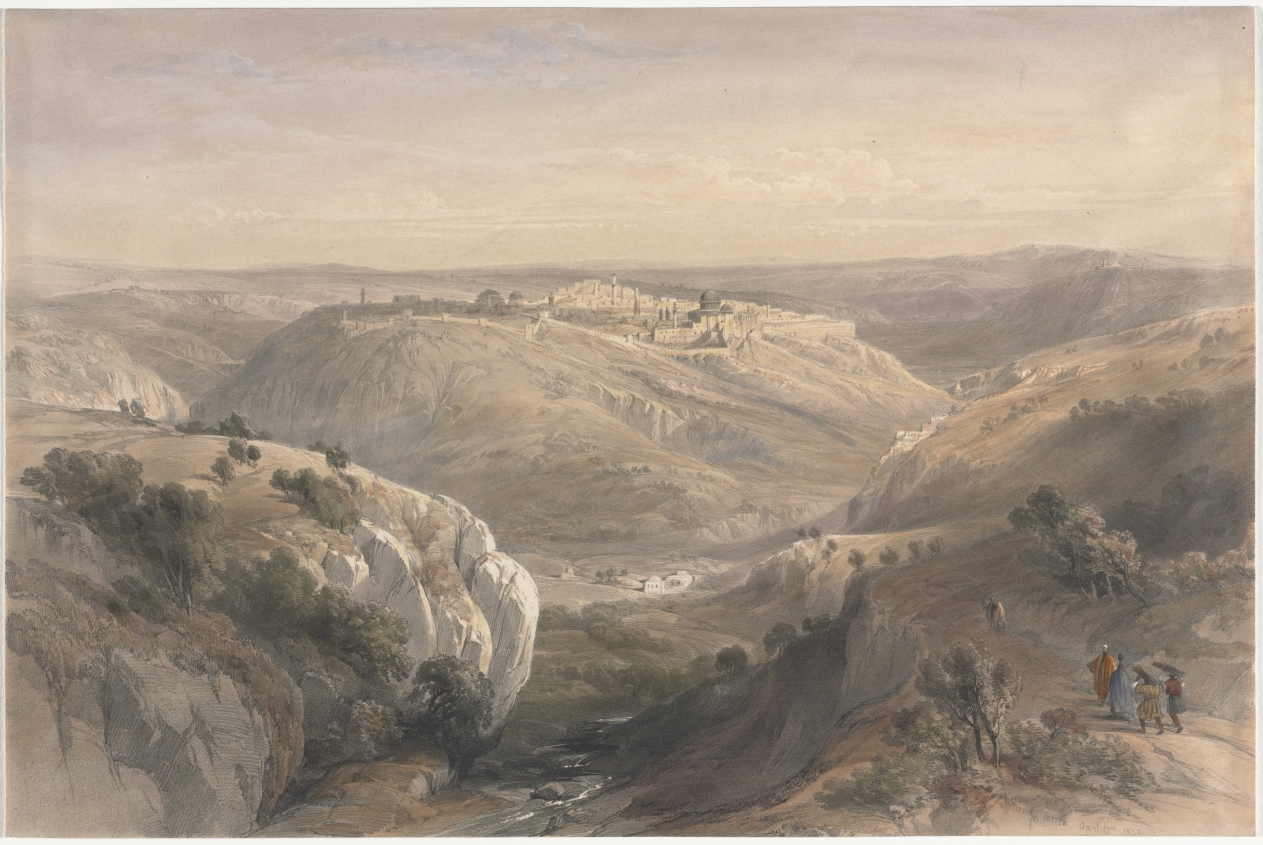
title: Jerusalem from the South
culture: England, 19th century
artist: David Roberts (Scottish, 1796–1864)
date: 1839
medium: color lithograph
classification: Print